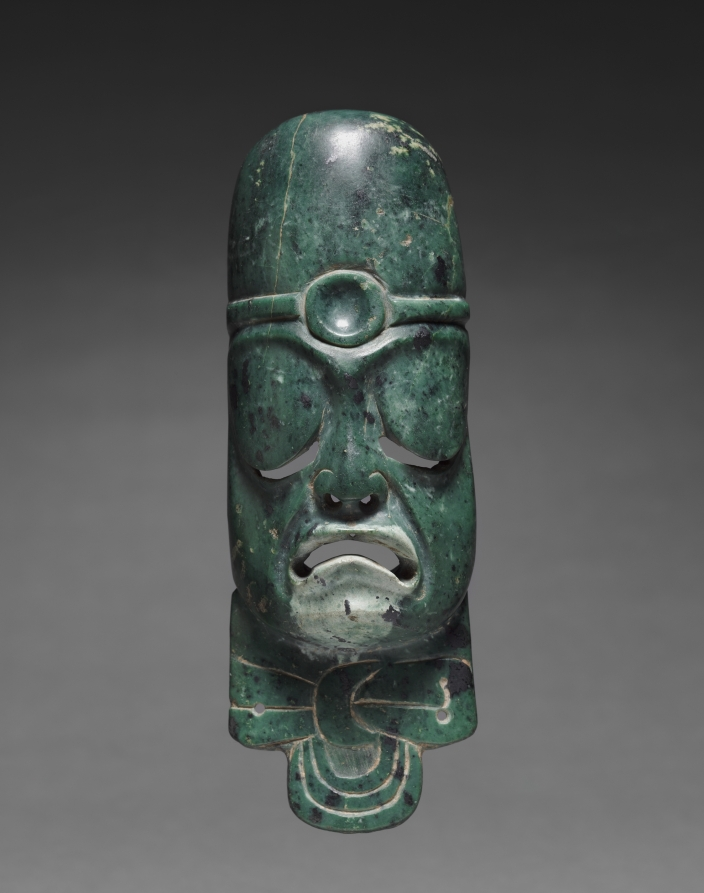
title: Elongated Mask Ornament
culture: Mesoamerica, Mexico, Olmec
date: c. 900–300 BCE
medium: greenstone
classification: Sculpture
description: Small masks made of precious media-especially greenstone, which Mesoamerican people valued above most other materials-likely served as elements of Olmec elite regalia. Such masks commonly depict human faces, although it is unclear whether the creature shown on this unusual example is human or supernatural. It may be a late work.